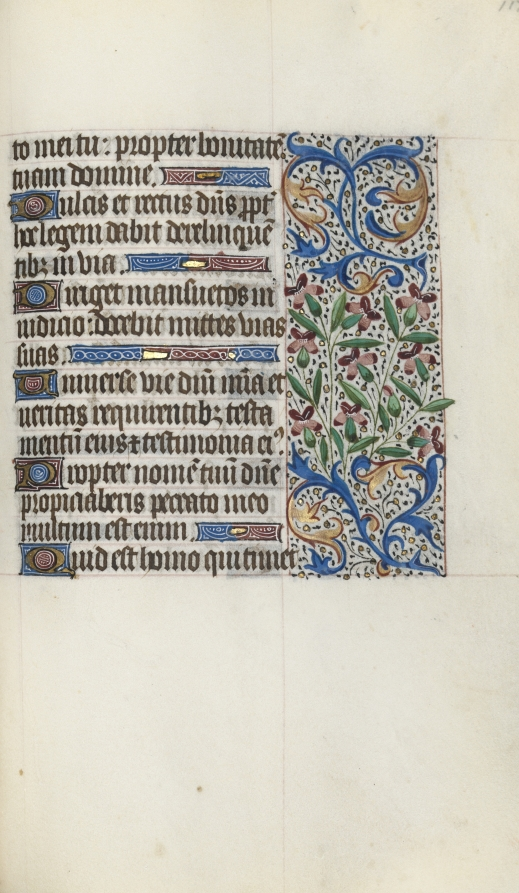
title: Book of Hours (Use of Rouen): fol. 119r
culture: France, Rouen, 15th century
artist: Master of the Geneva Latini (French, active Rouen, 1460–80)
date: c. 1470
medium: ink, tempera, and gold on vellum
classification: Bound Volume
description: In the late 1400s and early 1500s Rouen was an established and important center of book production. The city’s cathedral had a wealthy chapter that spent large sums of money to commission books and to maintain its extensive library. The stationers and booksellers would have likely been concentrated in or near the cathedral precinct. This artist, named after a manuscript now in Geneva, was Rouen’s principal illuminator during the second half of the 1400s.